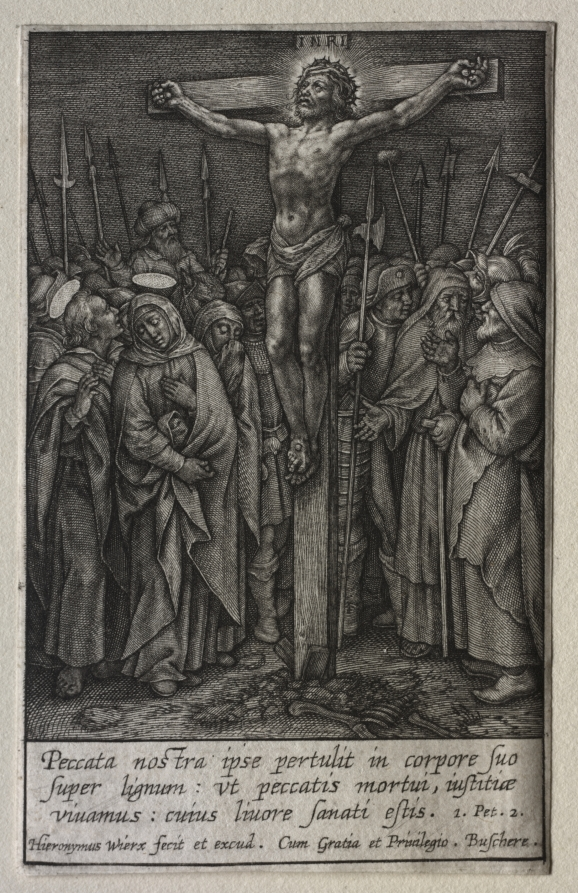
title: The Passion: Christ Crucified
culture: Flanders, late 16th-early 17th century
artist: Hieronymus Wierix (Flemish, 1553–1619)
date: before 1619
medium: engraving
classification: Print